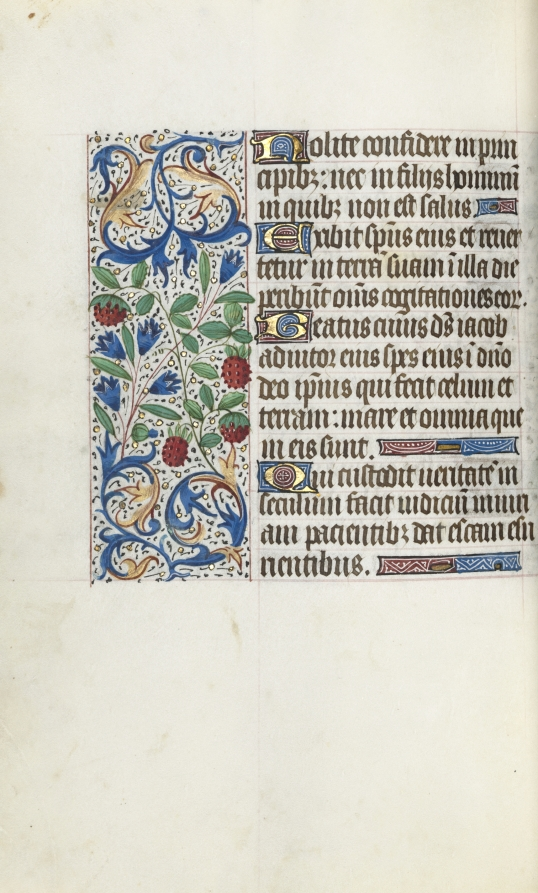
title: Book of Hours (Use of Rouen): fol. 108v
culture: France, Rouen, 15th century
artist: Master of the Geneva Latini (French, active Rouen, 1460–80)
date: c. 1470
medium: ink, tempera, and gold on vellum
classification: Bound Volume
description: In the late 1400s and early 1500s Rouen was an established and important center of book production. The city’s cathedral had a wealthy chapter that spent large sums of money to commission books and to maintain its extensive library. The stationers and booksellers would have likely been concentrated in or near the cathedral precinct. This artist, named after a manuscript now in Geneva, was Rouen’s principal illuminator during the second half of the 1400s.